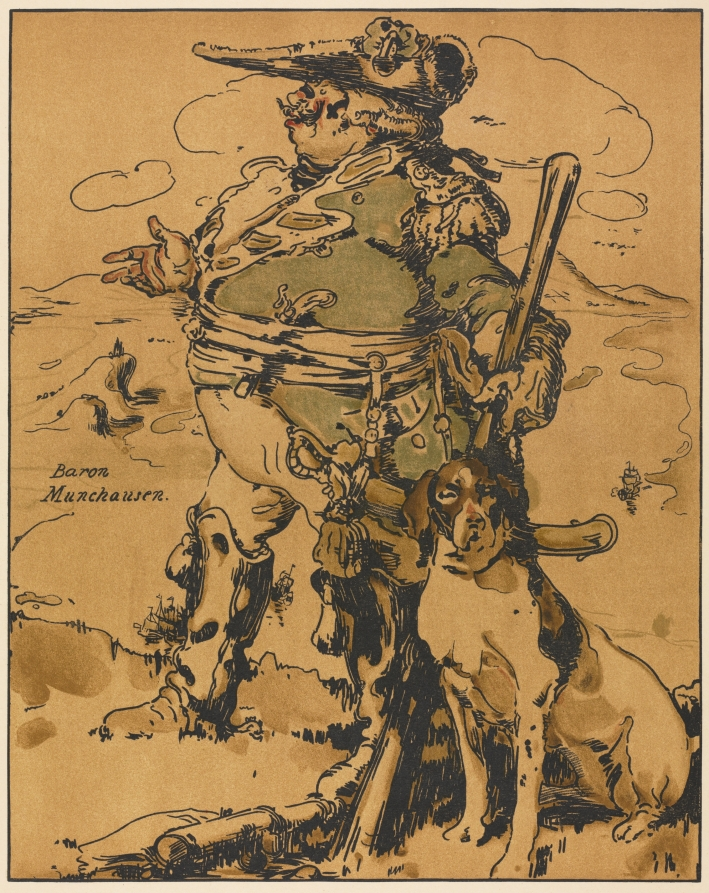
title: Characters of Romance: Baron Muchausen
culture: England, early 20th century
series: portfolio of 16 lithographs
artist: William Nicholson (British, 1872–1949)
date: 1900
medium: color lithograph with hand coloring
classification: Print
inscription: Verso, top right, in pencil (not artist's hand): "189496"